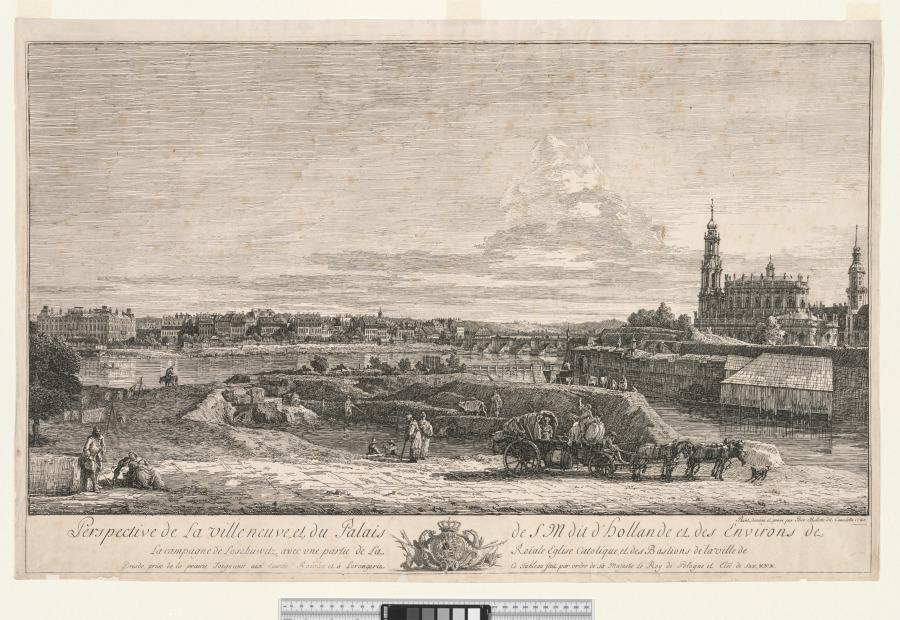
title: View of Dresden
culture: Italy, 18th century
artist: Bernardo Bellotto (Italian, 1721–1780)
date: 1748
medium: etching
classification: Print